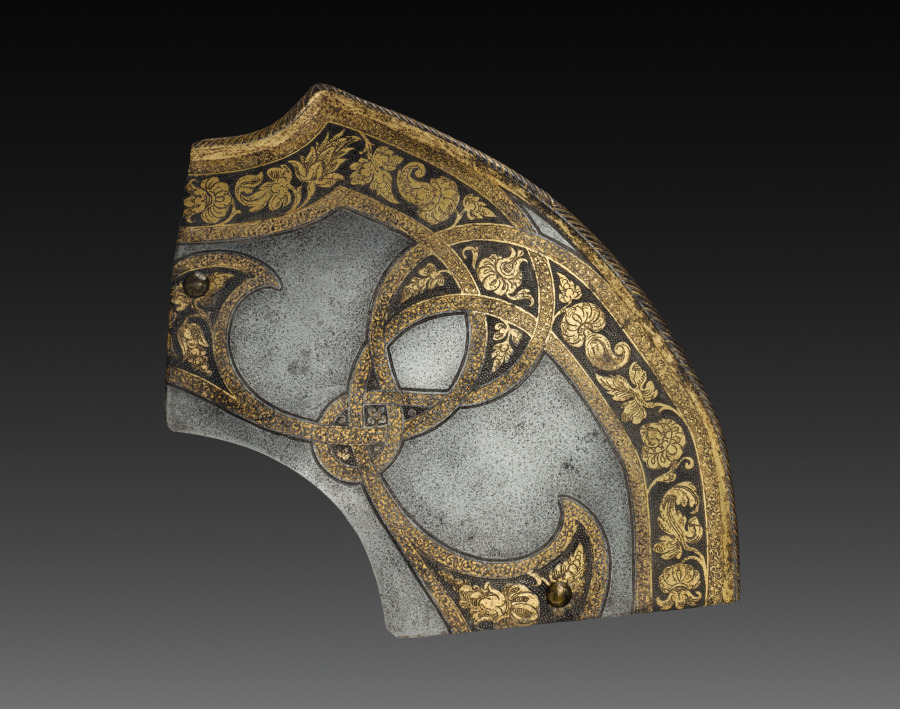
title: Pommel Plate of a Saddle (from the "Flechtband" Garniture of Rudolf II and Archduke Ernst, Vienna)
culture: Germany, Augsburg, 16th century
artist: Anton Peffenhauser (German, 1525–1603)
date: c. 1571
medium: blued, etched, and gilded steel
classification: Arms and Armor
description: This plate, one of two was once part of a saddle, are from tournament armor for man and horse made for the sons of Emperor Maximilian II, archdukes Rudolf and Ernst. Most of the remaining elements of this armor are still in the collections of the Imperial Armouries in Vienna. The decorative pattern (in the imperial colors of black and gold) forms elegant knots, with distinctive foliage and hop sprigs filling the loops.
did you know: Once part of a saddle, this plate protected the rider's thigh.